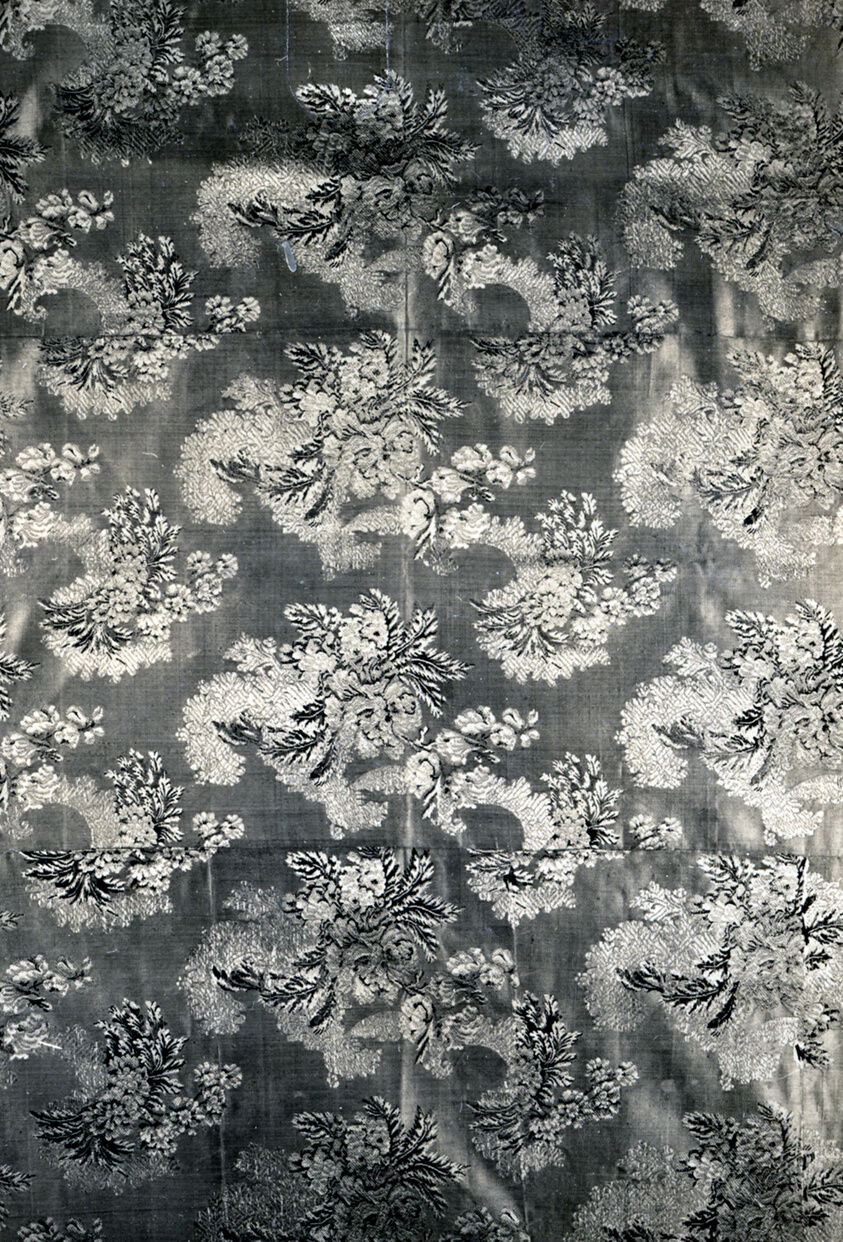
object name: Textile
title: Panel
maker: France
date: Mid–18th century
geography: France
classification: textile; weaving